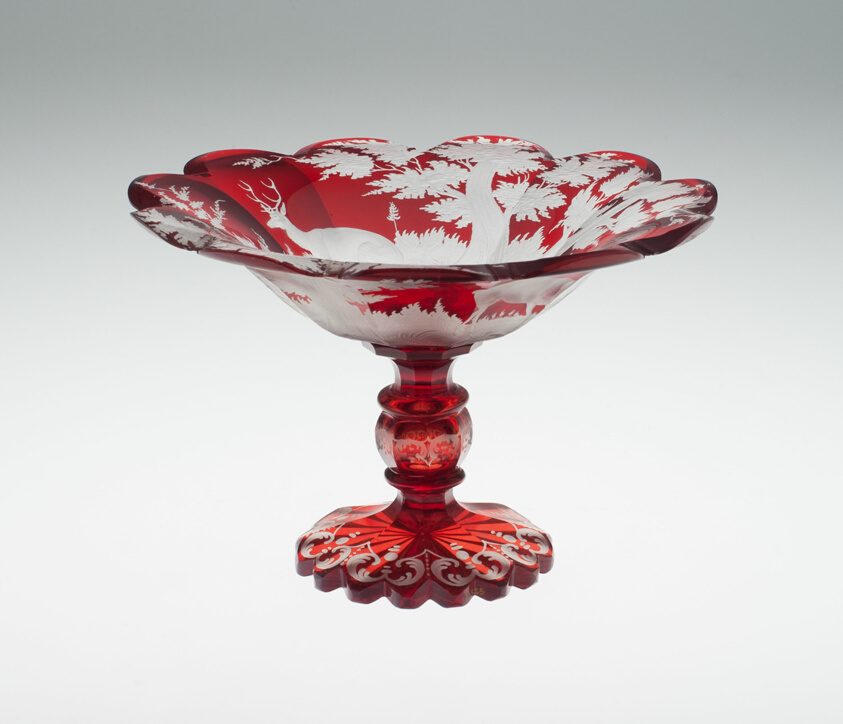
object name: Glass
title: Compote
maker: Bohemia, Czech Republic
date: c. 1850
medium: Glass; blown, cut, stained red and engraved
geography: Bohemia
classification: compote; glass; dish (vessel); european decorative arts